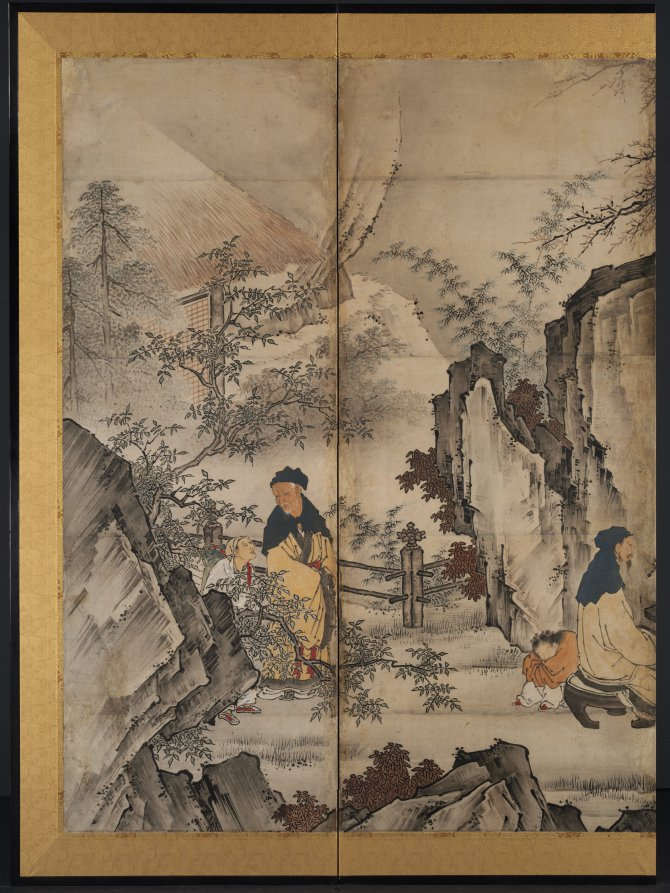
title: The Four Accomplishments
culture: Japan, Momoyama period (1573–1615)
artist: attributed to Kano Shōei (Japanese, 1519–1592)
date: late 1500s–early 1600s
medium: One of a pair of six-panel folding screens; ink and slight color on paper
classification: Painting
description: This is one of a pair of screens showing a group of elite Chinese gentlemen and their servants in the countryside. One man is considering his painting-in-progress. Historically, practicing or admiring painting was considered a skill essential for cultured men in China.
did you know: Although the painter captures his companion's attention, his young servant is having a nap.